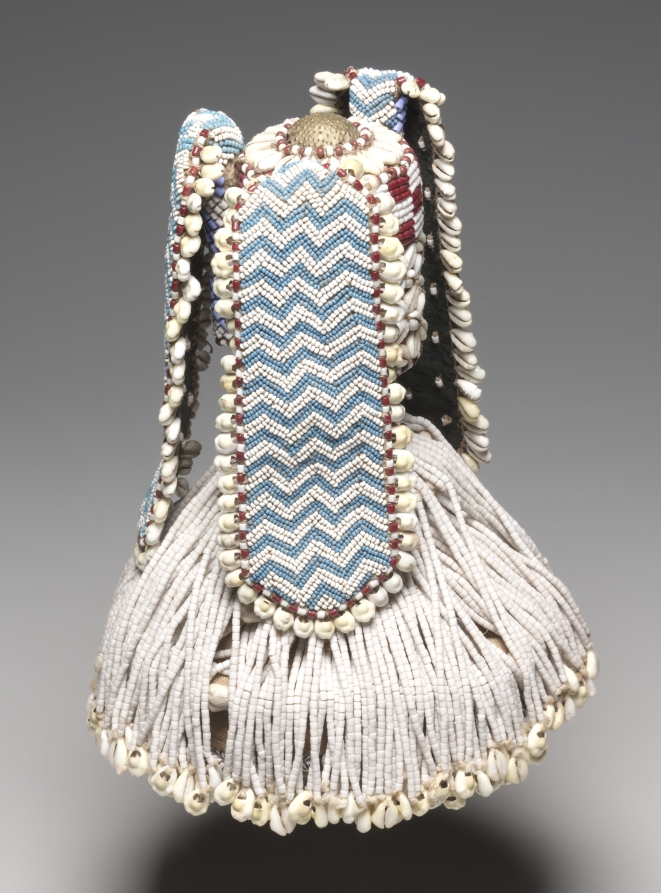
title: Hat (Kalyeem)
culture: Africa, Central Africa, Democratic Republic of the Congo, Kuba-style maker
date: possibly early 1900s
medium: Raffia, glass beads, cowrie shells, cloth (including wool), thread, and copper alloy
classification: Garment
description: Kuba men (and some women) show their title and status with hats and hat accessories. The male owner of this heavily beaded and shell-covered hat (kalyeem) had a senior title. A simple coiled basketry hat forms its foundation (similar to 1915.465). Fabric panels stitched with zig-zagging white and blue beads edged in cowries hang from the top. White bead strands with cowrie shells flow downward, pushed out over the forehead by a large brim. Technically and aesthetically, beaded Kuba hats and masks have much in common; artists specializing in beading techniques had the skills to make both, using imported beads and shells.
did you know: The imported beads and shells on this hat were expensive, so they showed off its wearers' wealth.